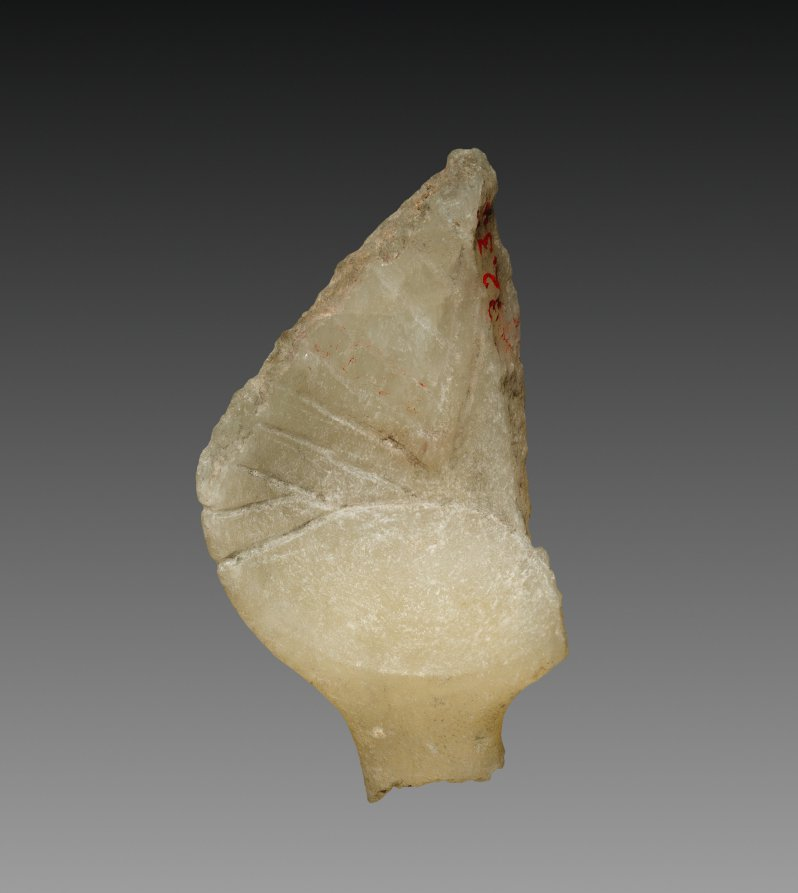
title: Fragment of a Cosmetic Dish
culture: Egypt, Amarna, North Suburb, house T.34.1. Excavations of the Egypt Exploration Society, 1930, New Kingdom (1540–1069 BCE), Dynasty 18, reign of Akhenaten (1351–1334 BCE)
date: 1353–1337 BCE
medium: travertine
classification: Cosmetic Objects